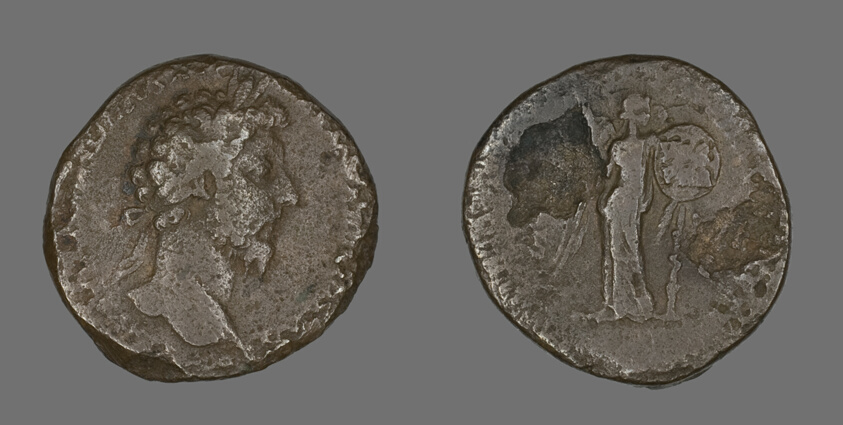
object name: Coin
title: Coin Portraying Emperor Marcus Aurelius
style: imperial (roman), ancient, roman (ancient, style or period)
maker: Roman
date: 161-180 (166?)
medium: Bronze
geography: Roman Empire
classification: coin; struck; ancient art